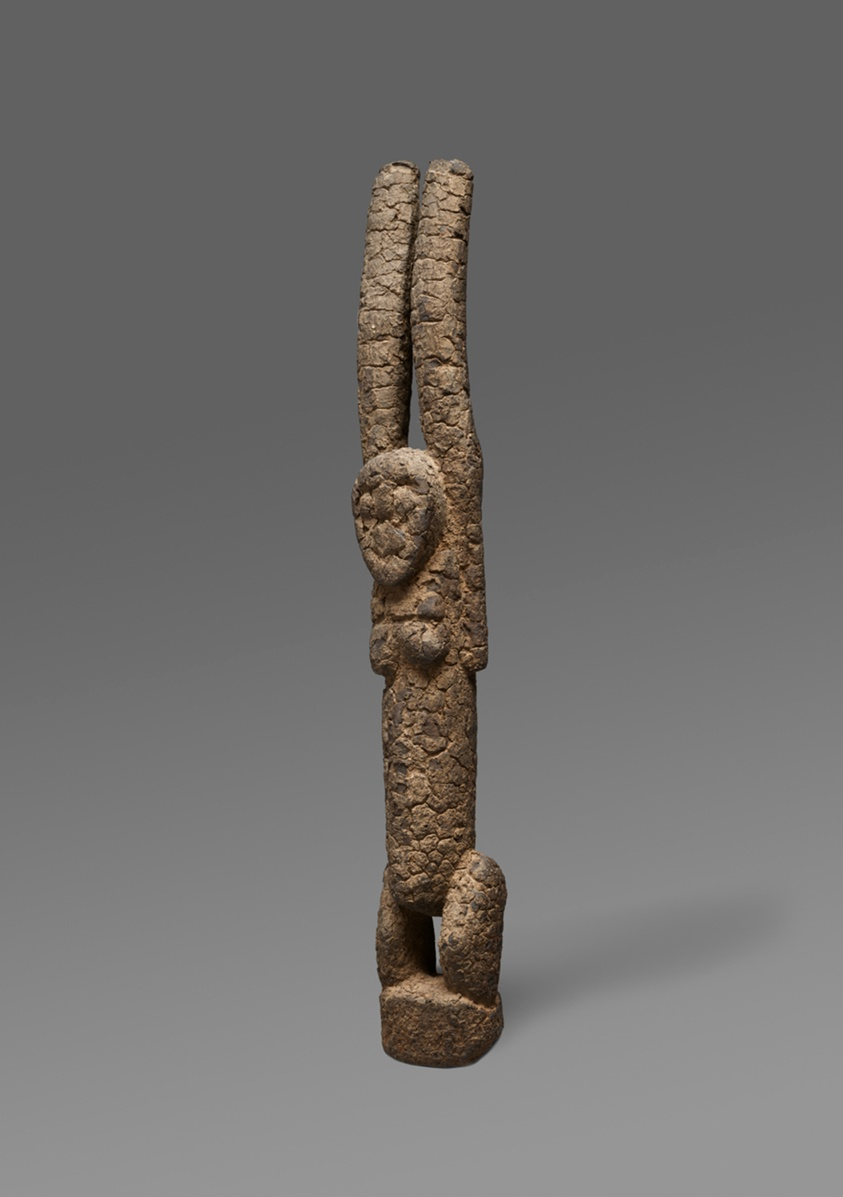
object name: Sculpture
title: Female Figure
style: tellem, Arts of Africa, mali kingdom, Northern Africa and the Sahel, dogon, african Art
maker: Tellem or Dogon; Bandiagara region, Mali; Northern Africa and the Sahel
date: 11th-19th century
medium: Wood and sacrificial material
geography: Mali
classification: sculpture; wood; arts of Africa; african art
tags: female, abstract figures, altar, rainfall, sacrifice, shrines